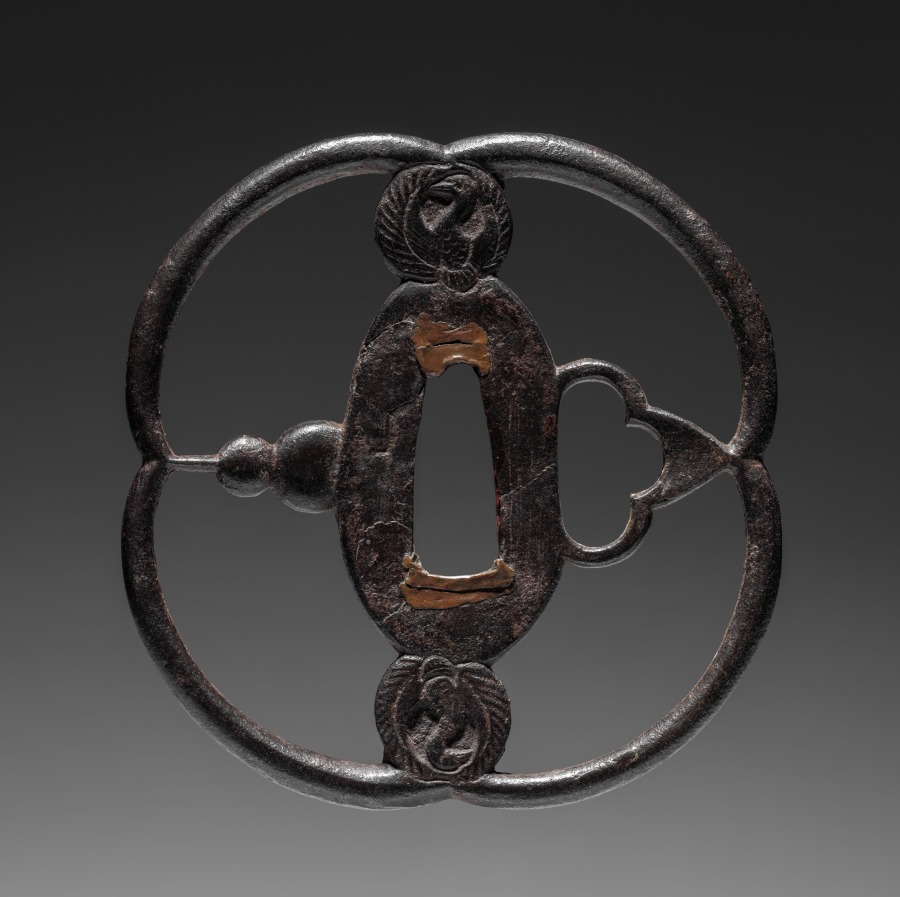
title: Sword Guard (Tsuba) with Cranes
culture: Japan, possibly Edo period (1615-1868)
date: c. 1615–1868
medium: iron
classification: Arms and Armor